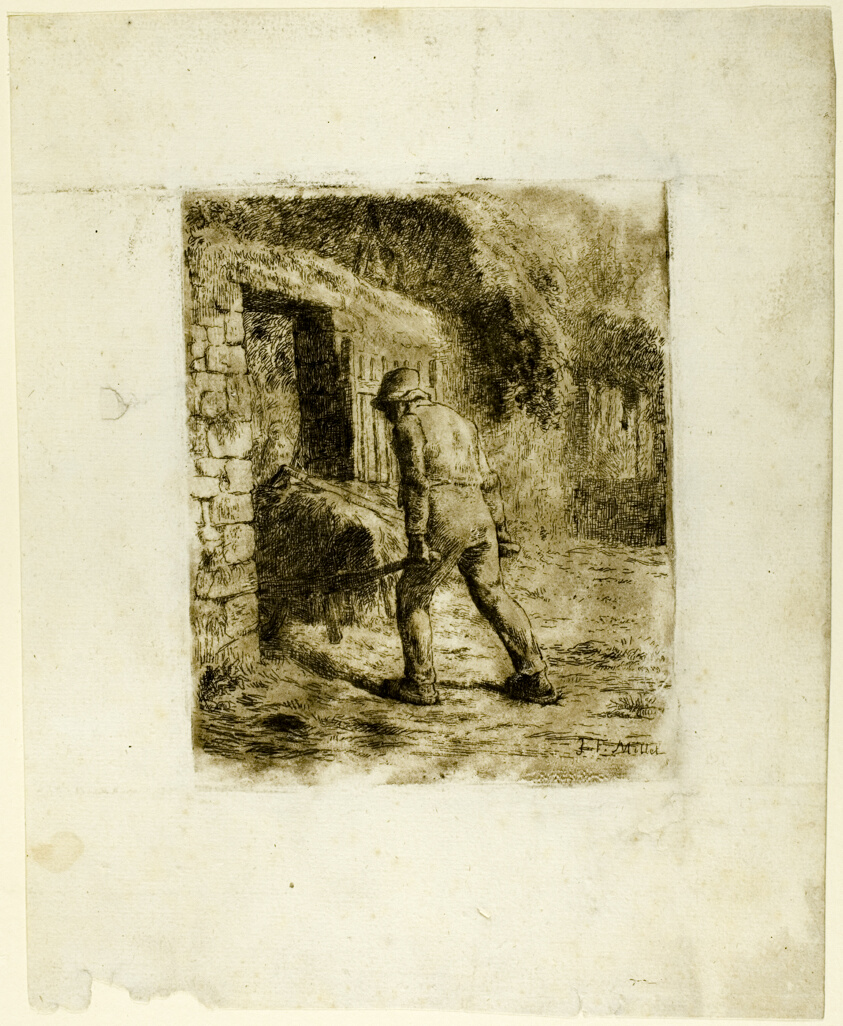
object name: Print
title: Peasant with a Wheelbarrow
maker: Jean François Millet (French, 1814-1875)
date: 1855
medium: Etching and drypoint in dark brown on ivory laid paper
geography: France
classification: etching; print; prints and drawing